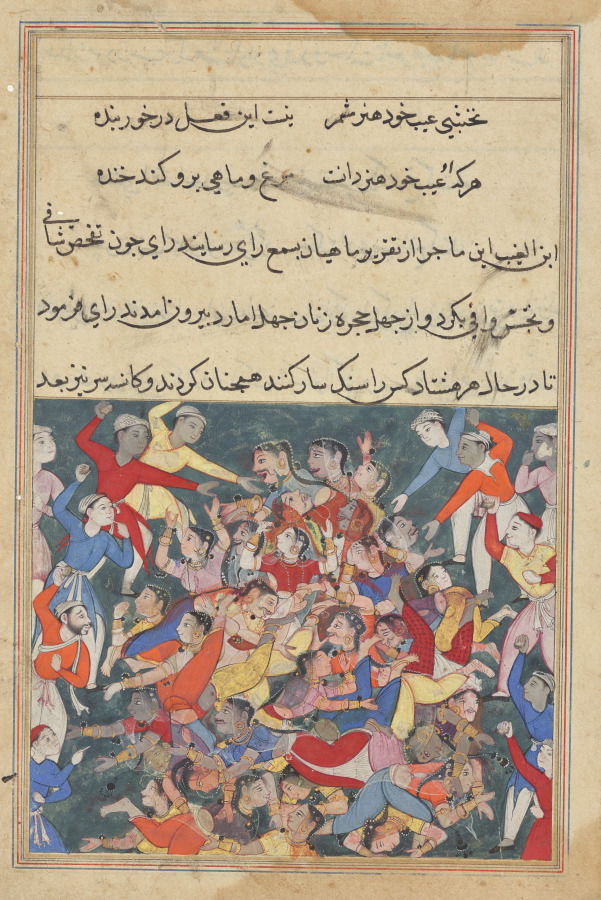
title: The forty wives and their secret paramours being punished by stoning to death, from a Tuti-nama (Tales of a Parrot): Twenty-third Night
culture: Mughal India, court of Akbar (reigned 1556–1605)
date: c. 1560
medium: gum tempera, ink, and gold on paper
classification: Painting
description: The Raja’s wives have been hiding forty young men dressed as women in their chambers. When their amorous affairs were revealed, all eighty were killed. Their deaths fulfilled an old prophecy written on a mysterious skull. The Raja’s men stand on the edges of the composition, hurling stones into the pile of intertwined bodies.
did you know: Mustaches are visible on several women in the pile, indicating that they are men in disguise.